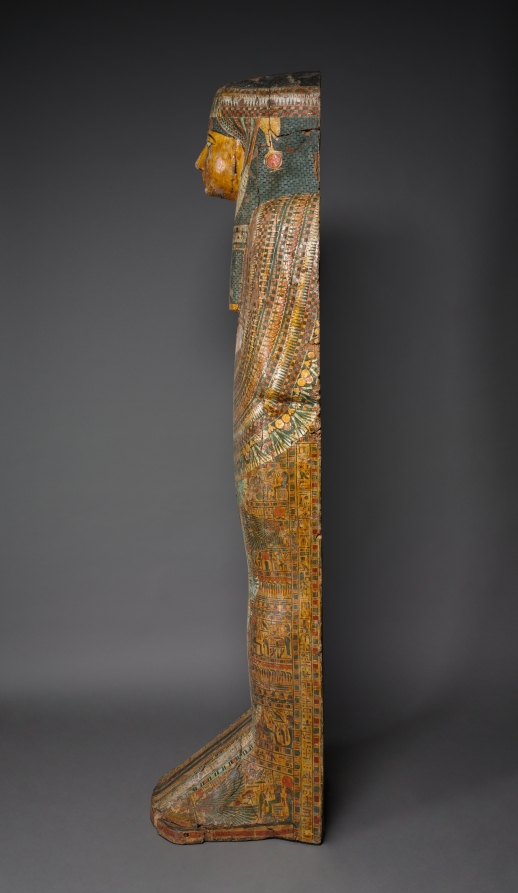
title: Coffin of Nesykhonsu (lid)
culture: Egypt, Third Intermediate (1069–715 BCE), Dynasties 21–22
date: c. 976–889 BCE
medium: gessoed and painted sycamore fig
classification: Funerary Equipment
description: A complete set of coffins during the late New Kingdom and Third Intermediate Period consisted of an outer and inner coffin and a mummy board (essentially a lid without a case, placed directly over the wrapped mummy). Judging by its size, this must have been Nesykhonsu's outer coffin. The type is essentially the same as the coffin of Bakenmut, which was also an outer coffin. The two coffins are said to have been found together and to have belonged to a man and wife. This is quite possible, although the inscriptions do not bear it out. Bakenmut is not mentioned on Nesykhonsu's coffin, nor is she mentioned on his. There was by this time a tremendous repertoire of scenes appropriate for coffin decoration. Whereas Bakenmut's coffin features images of deified dead pharaohs, Nesykhonsu's is decorated in a more personal way with scenes from her own funeral. The main scene in the interior (near the top) shows a priest clad in a panther skin with the mummy of Nesykhonsu behind. The god appears in mummy form and wears a sun disk on his head. The scarab beetle inside the sun disk identifies him as Khepri, the morning sun, and the hieroglyphs to the right identify him as Atum, the evening sun. Taken together, image and text represent the sun god in both his rising and setting, youthful and aged aspects.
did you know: Two of Nesykhonsu's titles, "Lady of the House" and "Singer of the Choir of Mut the Great," are written on the outside of the coffin.